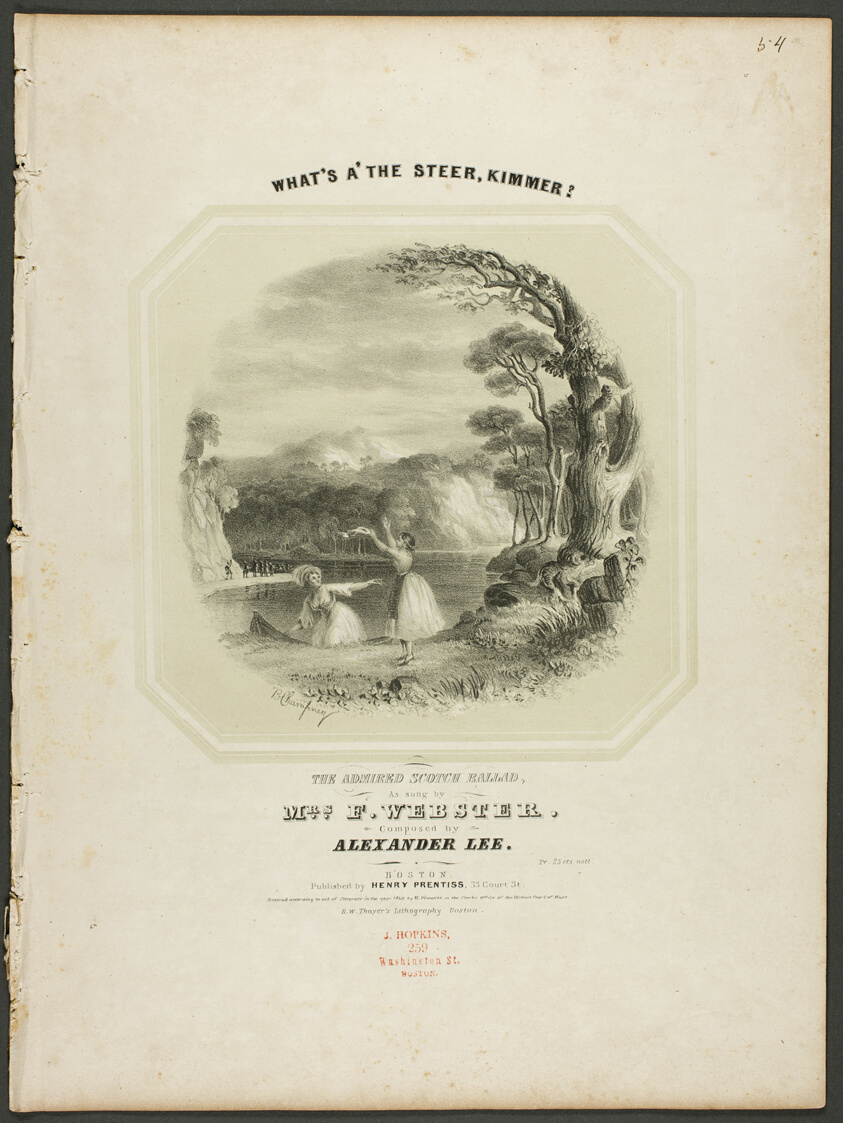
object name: Print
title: What's A' The Steer, Kimmer!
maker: Benjamin Champney (American, 1817–1907)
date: 1840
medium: Tint lithograph on ivory wove paper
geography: United States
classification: lithograph; print; prints and drawing